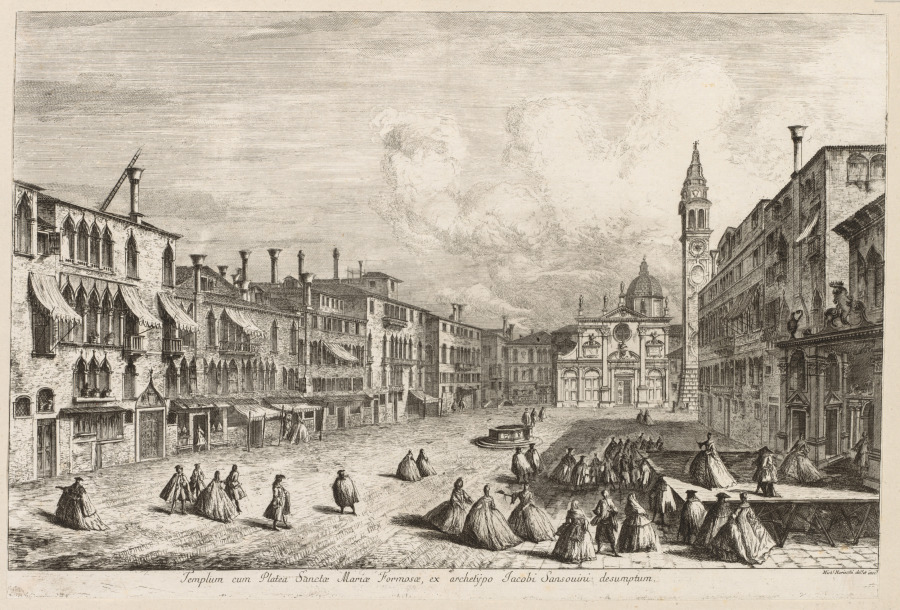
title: Views of Venice: S. Maria Formosa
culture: Italy, 18th century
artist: Michele Marieschi (Italian, 1710–1743)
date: 1741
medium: etching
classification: Print